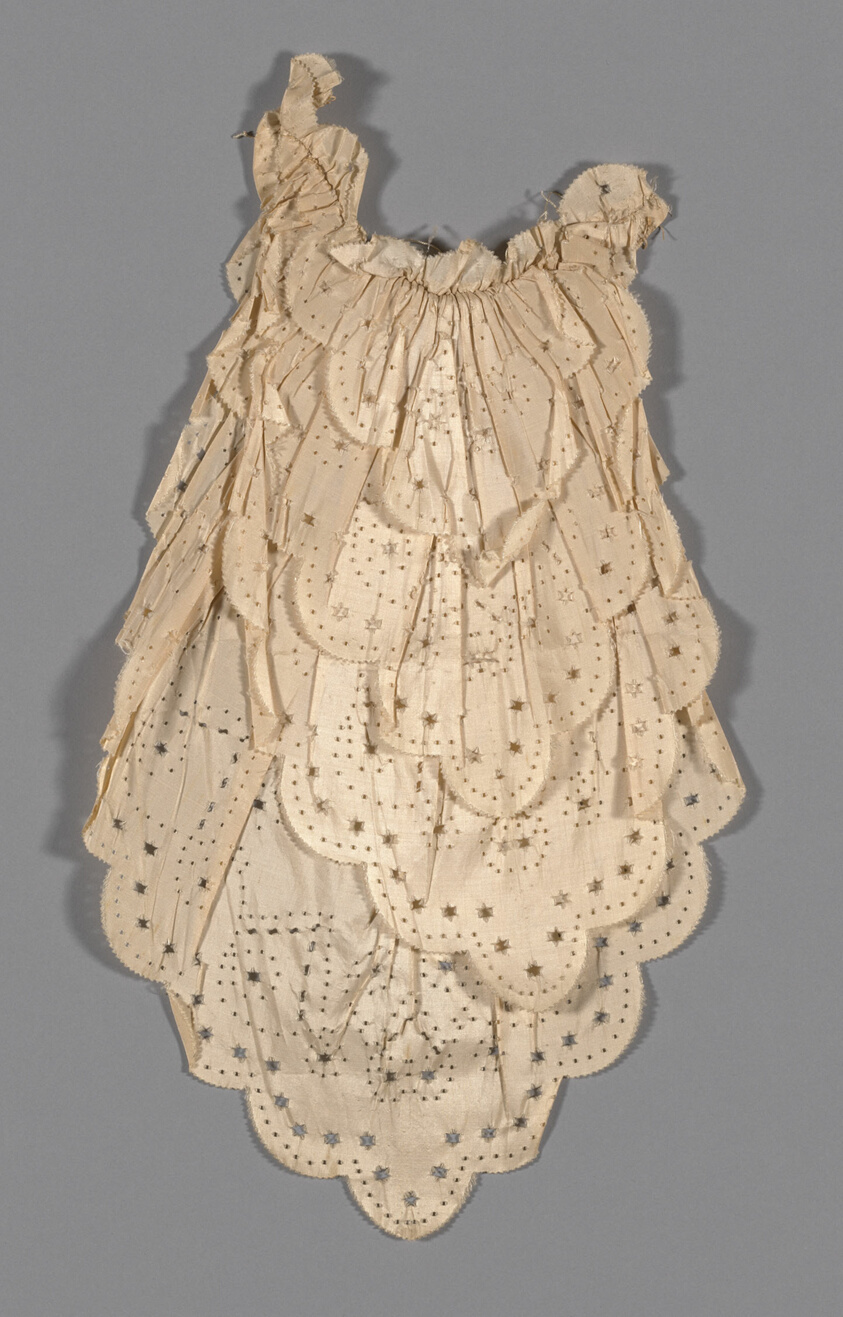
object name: Textile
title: Sleeve Pieces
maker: France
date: 1758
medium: White taffeta with cut work pattern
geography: France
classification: textile; weaving